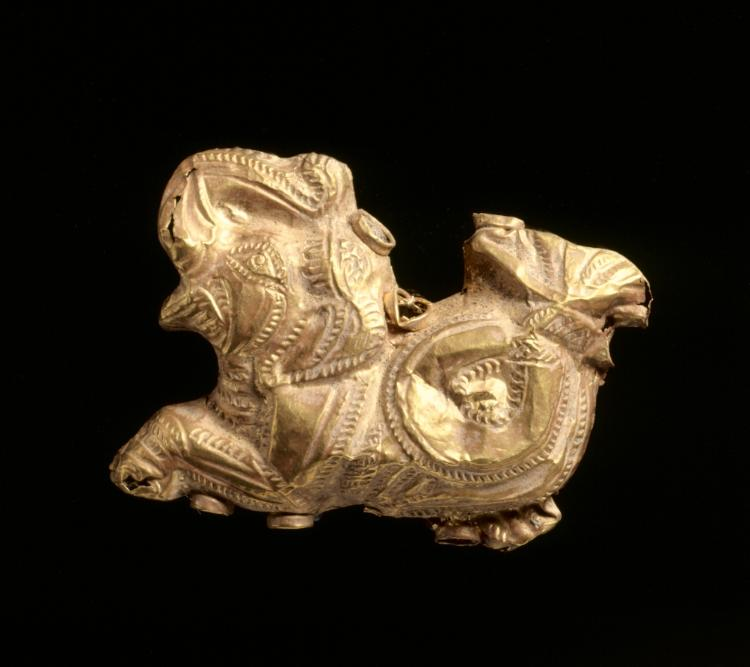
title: Pendant in the Shape of a Fish-Tailed Elephant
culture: India, Shunga period (185–78 BCE)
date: 185–72 BCE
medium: gold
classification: Jewelry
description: Because of water's life-giving properties, animals such as fish and Indian elephants who love the water were considered auspicious. This composite elephant with a playfully raised trunk and a curling fish tail would have been strung as a pendant on a necklace.